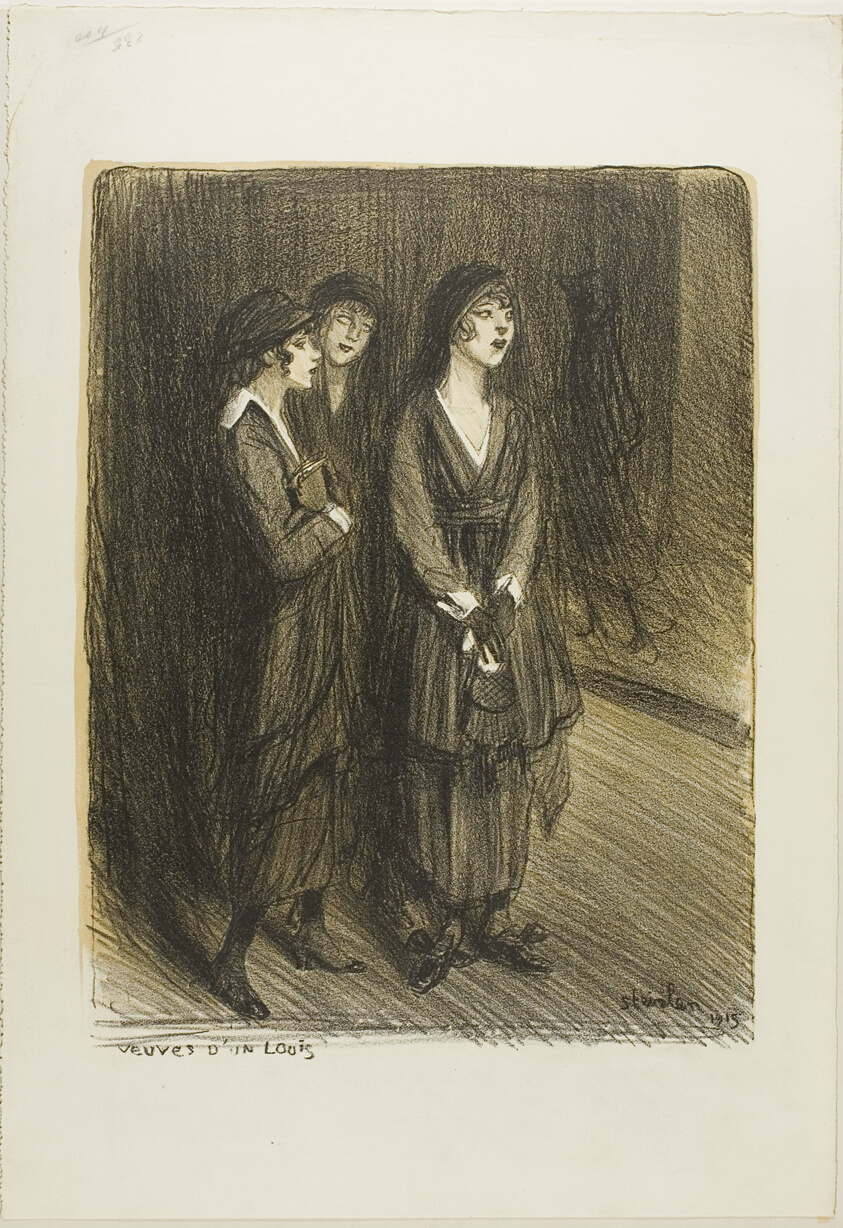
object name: Print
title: Veuves d'un Louis, plate seven from Actualités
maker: Théophile-Alexandre Steinlen; French, born Switzerland, 1859-1923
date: 1915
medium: Lithograph in black over a fawn tint on ivory wove paper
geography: France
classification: lithograph; print; prints and drawing